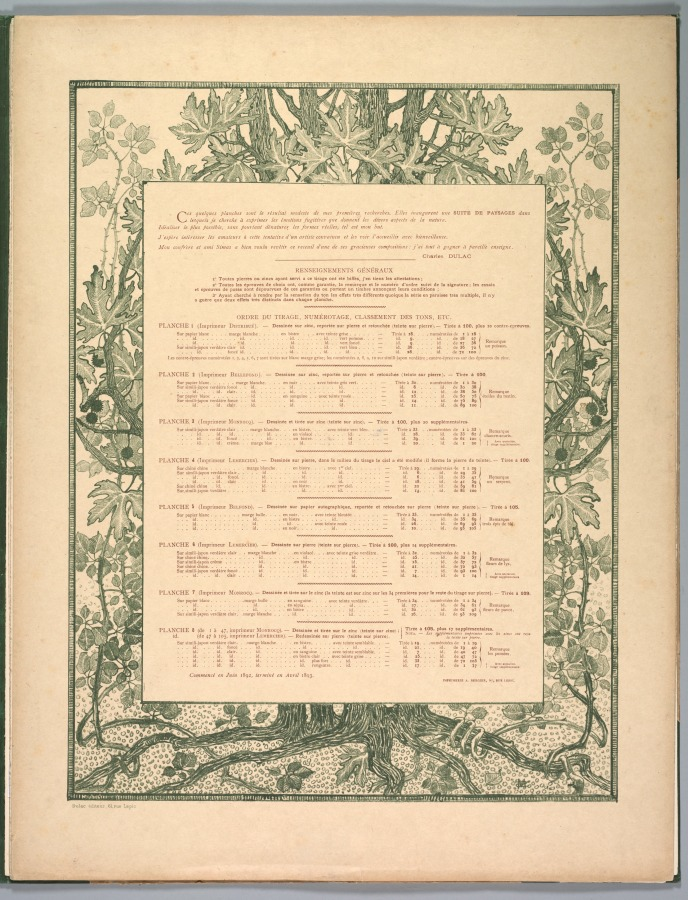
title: Suite de Paysages: Colophon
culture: France, 19th century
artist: Charles Marie Dulac (French, 1865–1898)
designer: Eugène Martial Simas (French, 1862–1926)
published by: Printer: A. Bergier (French)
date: 1892–93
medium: color lithograph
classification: Print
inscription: In plate, lower right in text section of colophon: IMPRIMERIE A. BERGIER, 65, RUE LEPIC. In plate, lower right within border, in green, monogram: MS In plate, below border, left, in green: Dulac éditeur 61, rue Lepic